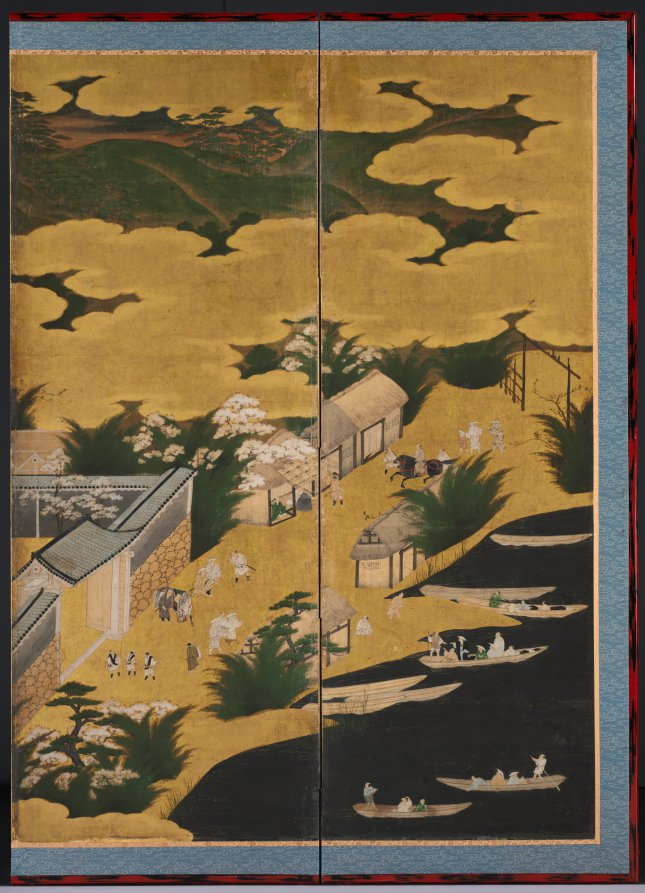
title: Famous Views of Ōmi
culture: Japan, Edo period (1615–1868)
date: 1660s–90s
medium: One of a pair of six-panel folding screens; ink, color, and gold on gilded paper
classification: Painting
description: Ōmi is an area around Lake Biwa near Kyoto. The Shinto shrine Hiyoshi Taisha and the Buddhist temple Ishiyamadera are in the upper right and upper left of the composition, respectively. At center is the pilgrimage route and people in the town before the temple gates. Harvested rice fields to the right and flowering cherry blossom trees at left show seasonal change from winter to spring.